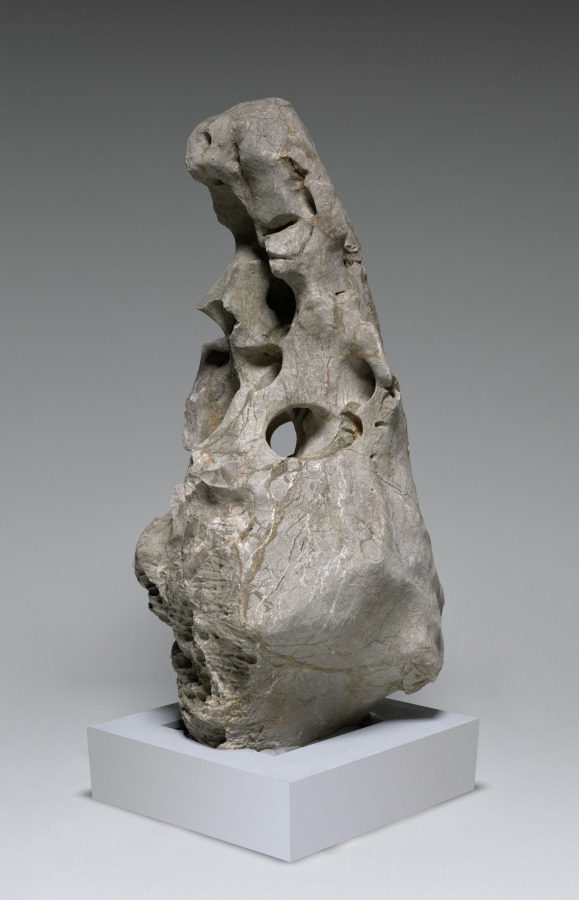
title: Taihu Garden Stone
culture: China, Jiangsu province, Wuxi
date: 0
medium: Limestone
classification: Stone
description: In China, rocks are considered elements of nature that possess spirit and life energy. With its upward winding masses, perforations, weathered surface, and multiple viewpoints, the stone exhibits sculptural qualities and embodies constant transformation through natural forces and human intervention. A solid piece of rock, it was originally sourced from the Lake Tai region. Stones were collected, set up in gardens, or installed on scholar’s desks as miniature mountains. Traditionally, Taihu stones were the most desirable type of rock. This stone is a gift by the contemporary artist Liu Dan, known for his depictions of rocks, who calls them "the stem cells of Chinese landscape."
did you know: The donor, Liu Dan, is the most prominent and celebrated painter of rocks in contemporary China.